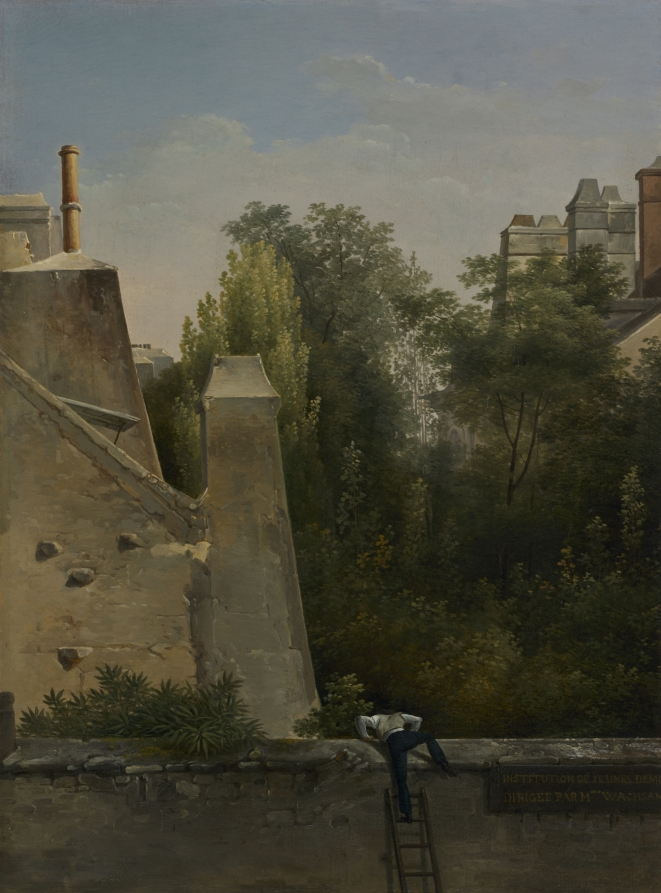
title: The Curious One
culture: France, 19th century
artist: Antoine Pierre Mongin (French, 1761–1827)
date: 1823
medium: oil on paper mounted to canvas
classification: Painting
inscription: Signed lower left: P. Mongin/1823. [effaced] Inscribed on wall lower right: institution de jeunes demo[iselles] / dirigee par mme wachsam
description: Here a young man uses a ladder to climb over a garden wall. The sign at his right translates into "School for Young Ladies under the Direction of Mrs. Wachsam"—wachsam being the German word for "watchful." Apparently, overcome by curiosity, the man cannot resist his desire to see the young women concealed behind the wall. Scenes with amorous, sometimes voyeuristic overtones are common in the work of Mongin. The artist also seems fascinated with depicting the exact details of his settings. In 1824, a critic who saw The Curious One wrote that Mongin's paintings are "portraits of houses coated in plaster, garden trees, almost trivial details, and this pleases me greatly. Full of naiveté, this is what I need in a landscape, as in a representation of man's actions." The critic's comments clearly demonstrate his appreciation for Mongin's work, as well as the artist's belief in the inherent relationship between nature and man.